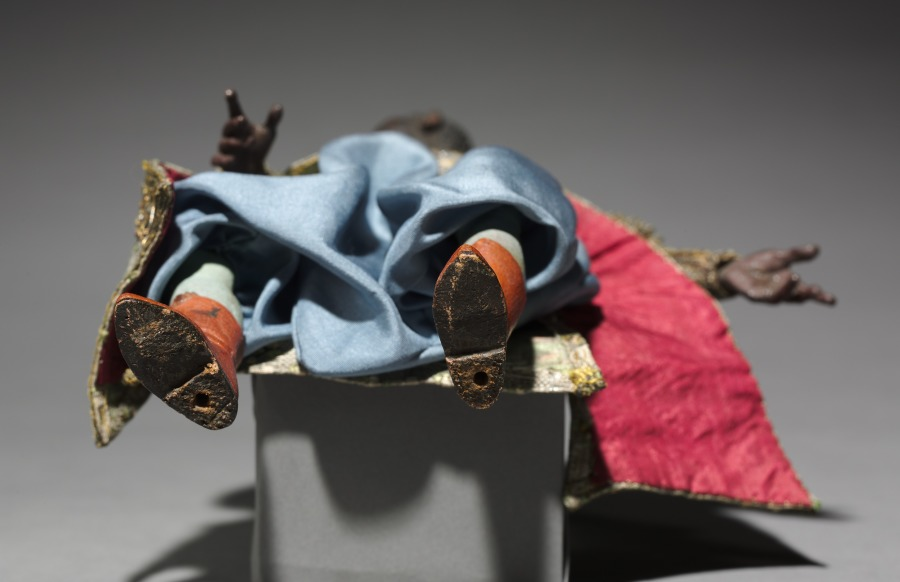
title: Figure from a Crèche: Attendant of the Magi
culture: Italy, Naples, late 18th-early 19th century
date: 1780–1830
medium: painted wood and terracotta with various textiles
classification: Sculpture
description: The practice of creating scenes of the Nativity for the home dates from the early 1700s in Italy, where people began to set up doll-like figures of about a foot or less in height. The custom was particularly popular in Naples around 1800, where crèche scenes (crèche means cradle, or crib) included many figures, whose heads and hands of painted terracotta, stuffed cloth bodies, and clothing adapted from contemporary local costumes gave them an amazingly realistic character. Representations of the birth of Jesus can be traced to the first few centuries of Christianity. Both living creatures and sculptural depictions of them were used from early times. By the late Middle Ages it was customary to create life-size figures of wood or stone, naturalistically painted, to represent the characters who participated in the events of Jesus's early life. These sculptures were then arranged in scenes illustrating one or both of the most important of these events, the Adoration of the Shepherds and the Adoration of the Magi—the three kings from the east who came to pay homage to the Christ child. Used in churches, these large figures were especially popular in Italy, Central Europe, Spain, and Portugal.